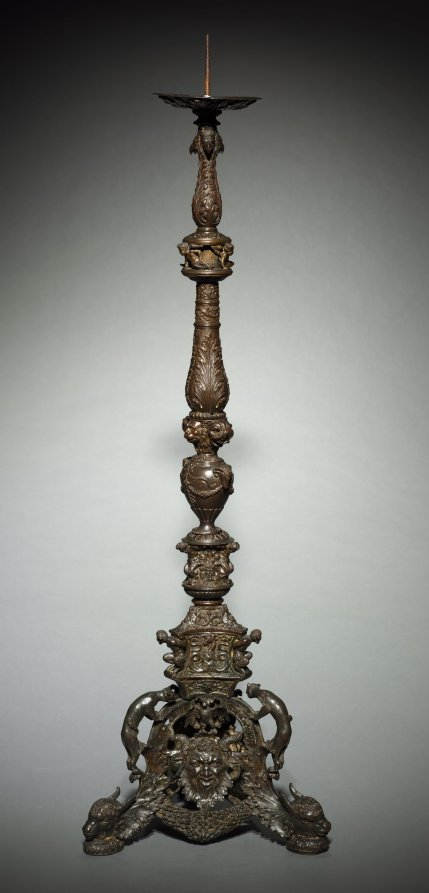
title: Paschal Candlestick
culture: Northern Italy, possibly Padua, 16th century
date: c. 1525–1550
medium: bronze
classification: Sculpture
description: In Roman Catholic practice, a large candlestick holds the Paschal Candle, blessed and lit for the first time on Easter eve, then used on significant occasions throughout the year. Despite its religious function, the decorations here are entirely secular-ranging from panthers and bound satyrs to the heads of raptors and goats. These elements derive from ancient Roman sculpture and were especially popular among intellectuals in northern Italy, who were actively exploring connections among pagan traditions, ancient philosophy, and Christianity.